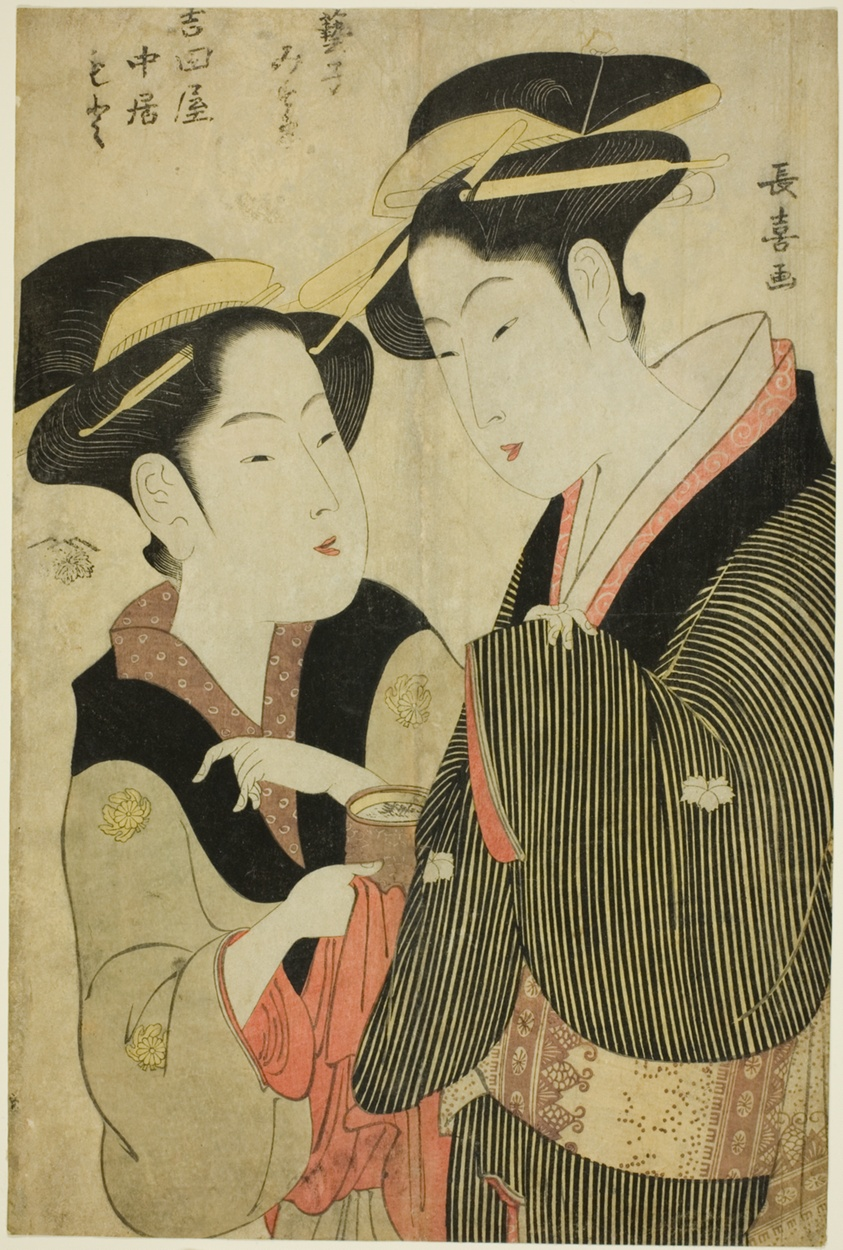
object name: Print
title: Moto, a Waitress of the Yoshidaya, and the Geisha Mizue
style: Japanese (culture or style)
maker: Eishosai Choki (Japanese, active c. 1790s-early 1800s)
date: c. 1794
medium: Color woodblock print; oban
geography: Japan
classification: woodblock print; print; asian art